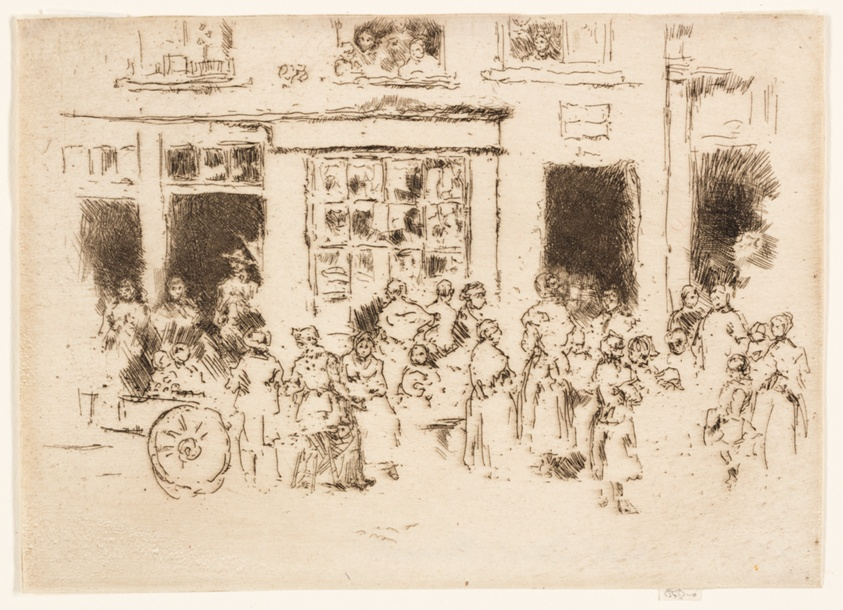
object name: Print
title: High Street, Brussels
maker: James McNeill Whistler (American, 1834-1903)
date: 1887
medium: Etching with foul biting in black ink on ivory laid paper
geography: United States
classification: etching; foul biting; print; prints and drawing; paper